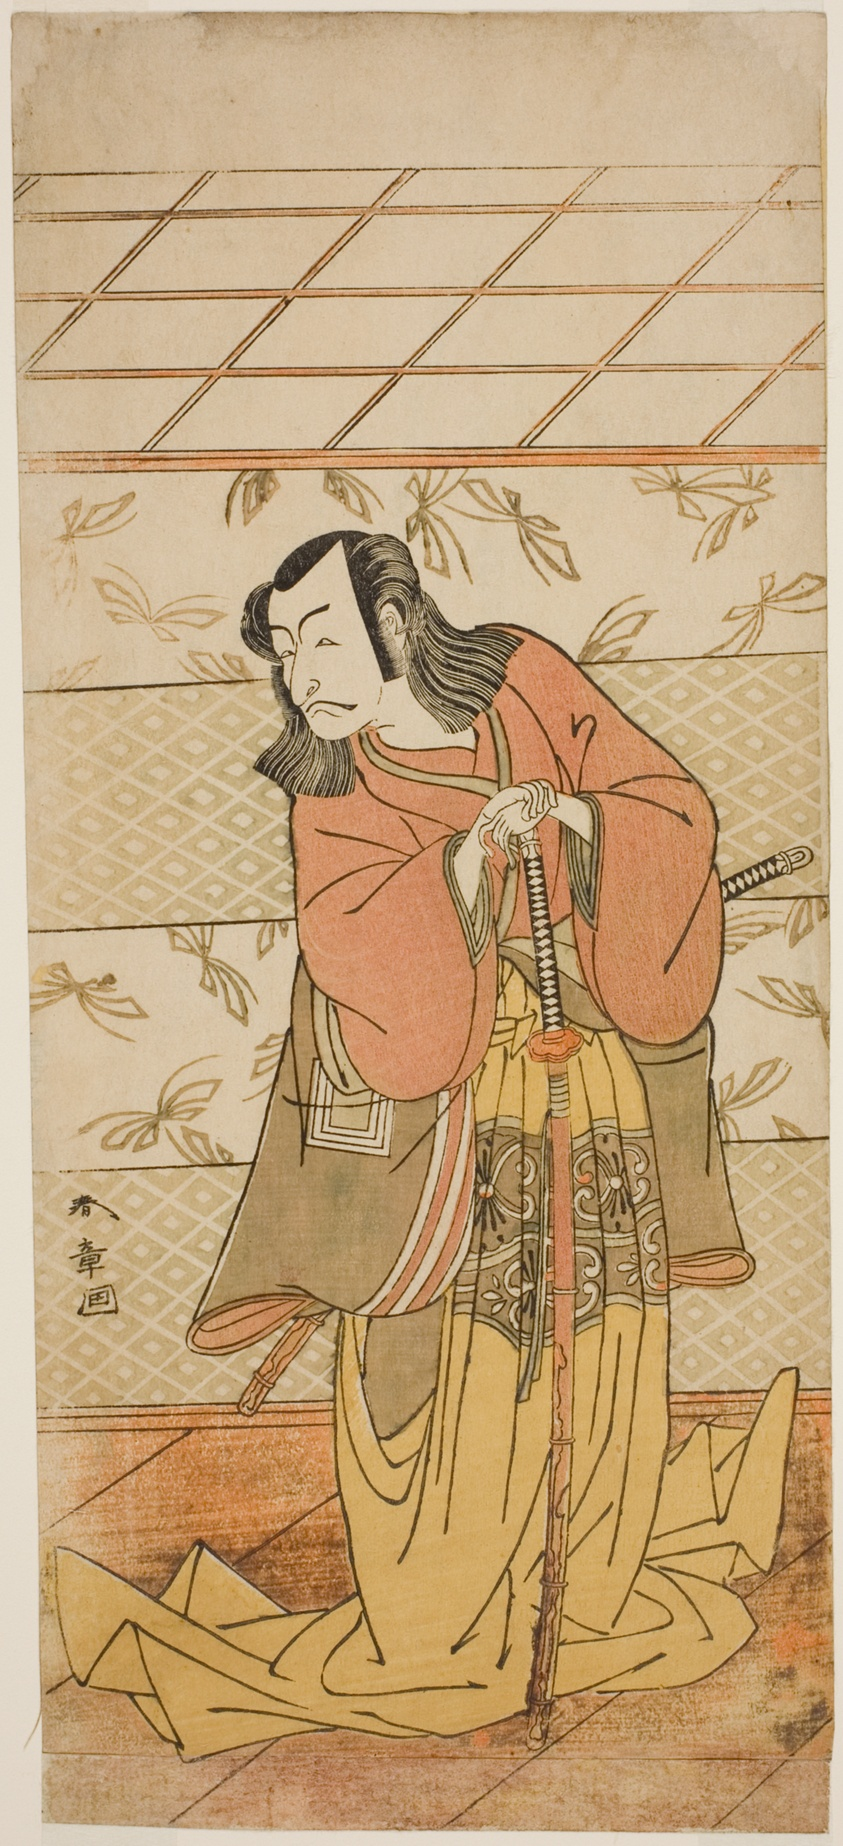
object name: Print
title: The Actor Ichikawa Danjuro V as Ashiya Doman in the Play Kikyo-zome Onna Urakata, Performed at the Morita Theater in the Seventh Month, 1776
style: Japanese (culture or style)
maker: Katsukawa Shunsho 勝川 春章; Japanese, 1726-1792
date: c. 1776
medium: Color woodblock print; hosoban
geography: Japan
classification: woodblock print; print; asian art